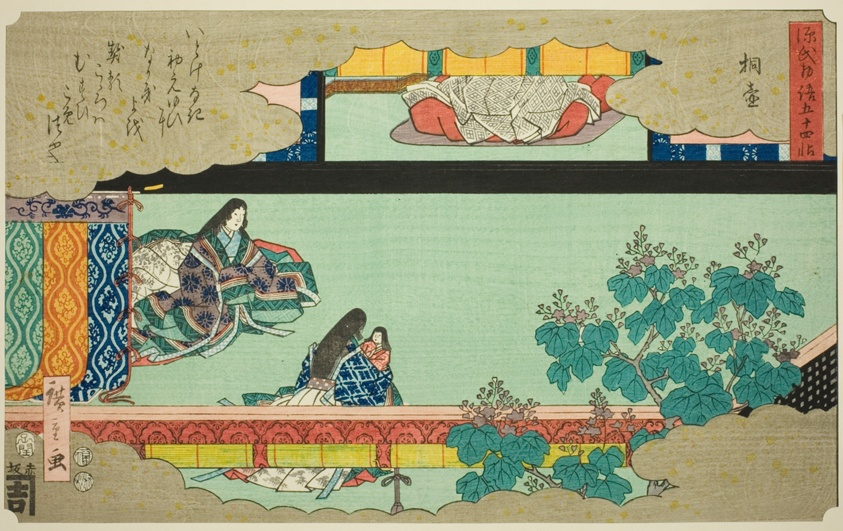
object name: Print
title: Kiritsubo, from the series "Fifty-four Chapters of the Tale of Genji (Genji monogatari gojuyonjo)"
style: Japanese (culture or style)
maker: Utagawa Hiroshige 歌川 広重; Japanese, 1797-1858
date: 1852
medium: Color woodblock print; oban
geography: Japan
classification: woodblock print; print; asian art